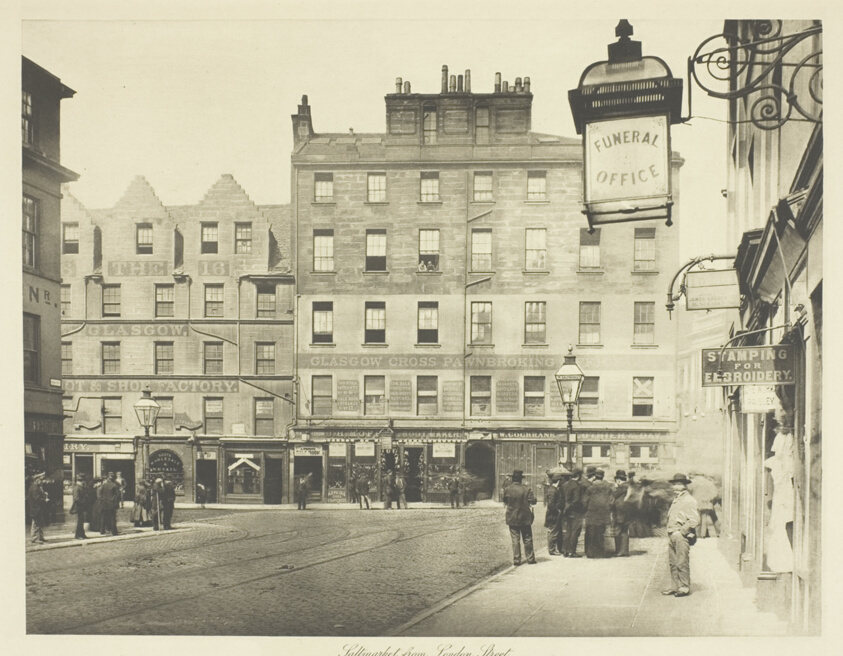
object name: Photograph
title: Saltmarket from London Street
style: 19th century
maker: Thomas Annan (Scottish, 1829–1887)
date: 1885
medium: Photogravure, plate 50 from the book "The Old Closes & Streets of Glasgow" (1900)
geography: Scotland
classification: photograph; photography